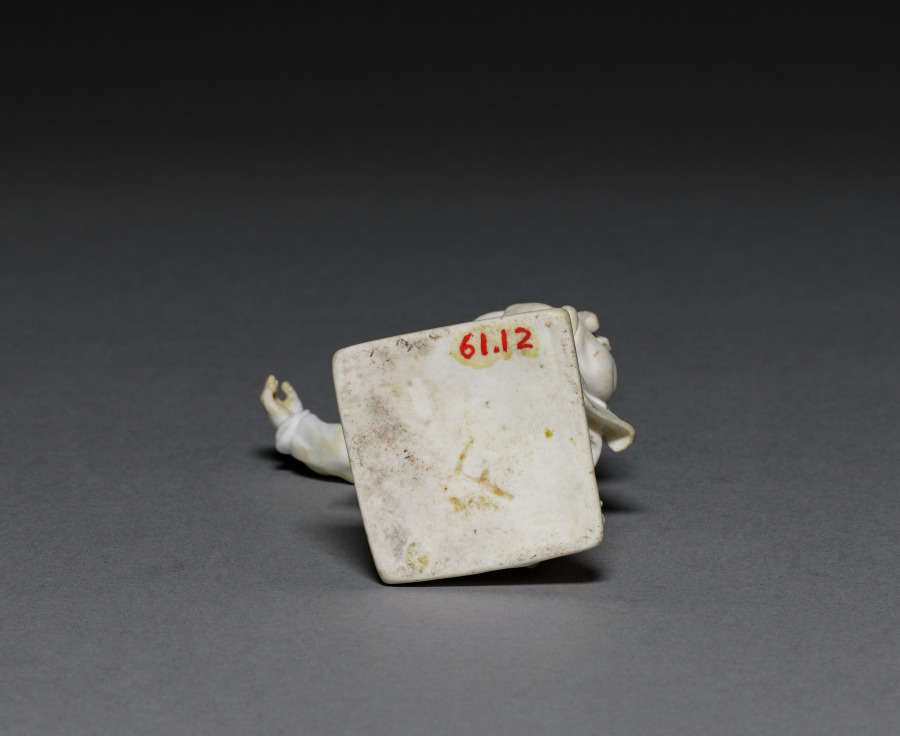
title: Figure of a Bird Charmer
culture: France, Sèvres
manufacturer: Sèvres Porcelain Factory (French, est. 1756)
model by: Etienne-Maurice Falconet (French, 1716–1791)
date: 1764–66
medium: Unglazed soft-paste porcelain (biscuit)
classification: Ceramic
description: Designs for 17 young children involved in various activities were issued by sculptor Étienne-Maurice Falconet and regularly reproduced as porcelain figurines. This figure, who stretches out his hand in anticipation that a bird might land, would have been modeled after one of these designs. Decorative figurines like these were often included in elaborate dining services to be placed about a table along with the usual tureens and tableware.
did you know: 31 figures modeled after Falconet’s series were included in the dinner service given by French King Louis XV to Christian VII, King of Denmark in 1768.